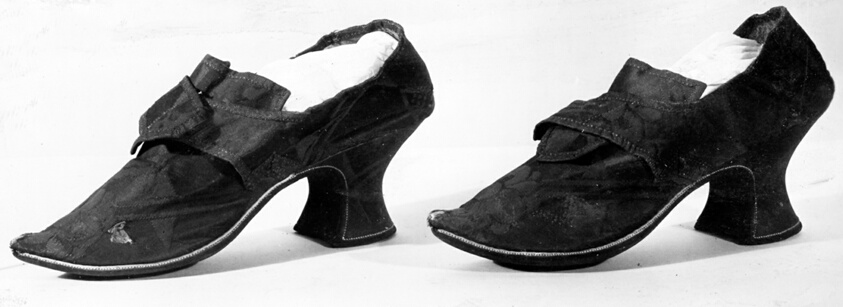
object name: Textile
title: Pair of Shoes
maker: England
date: c.1720s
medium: Leather, silk, damask weave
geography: England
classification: textile; shoes - misc; costume accessory - shoe; costume; dress (garment); clothing